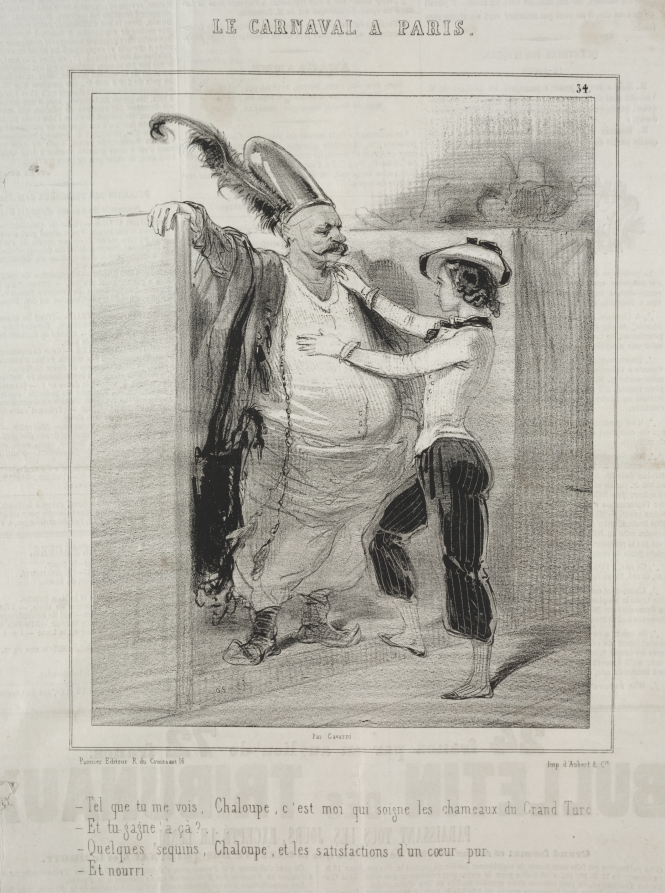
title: Carnaval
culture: France, 19th century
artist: Paul Gavarni (French, 1804–1866)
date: 1841–1843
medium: lithograph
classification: Print